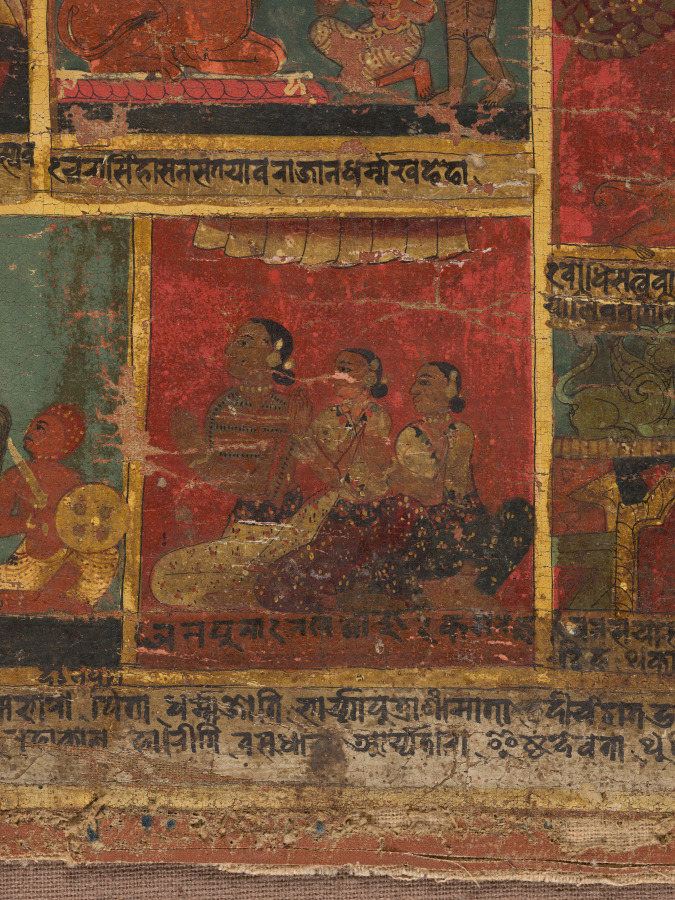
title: Bejeweled Buddha Preaching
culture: Nepal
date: 1648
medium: Gum tempera, ink, and gold on cloth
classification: Painting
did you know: Nepalese devotional paintings on cloth are called "paubha" in the Newari language.